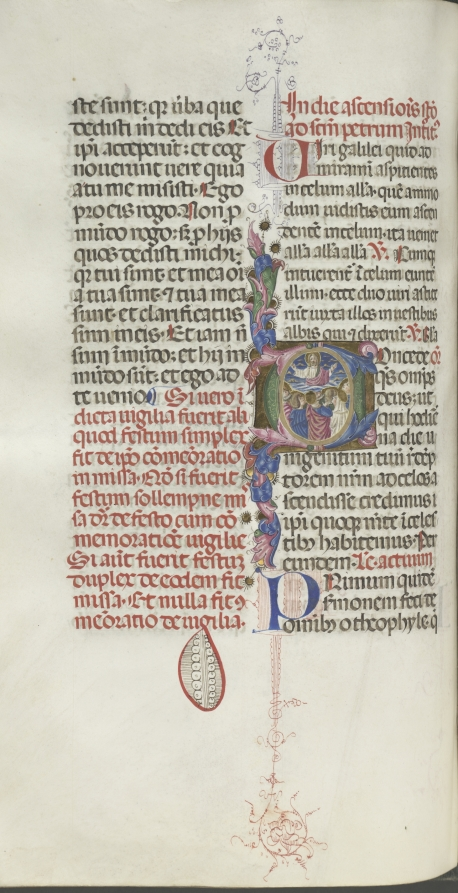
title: Missale: Fol. 208v: Ascension of Christ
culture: Italy, Perugia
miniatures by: Bartolommeo Caporali (Italian, c. 1420–1503)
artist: assisted by Giapeco Caporali (Italian, d. 1478)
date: 1469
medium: ink, tempera and burnished gold on vellum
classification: Bound Volume